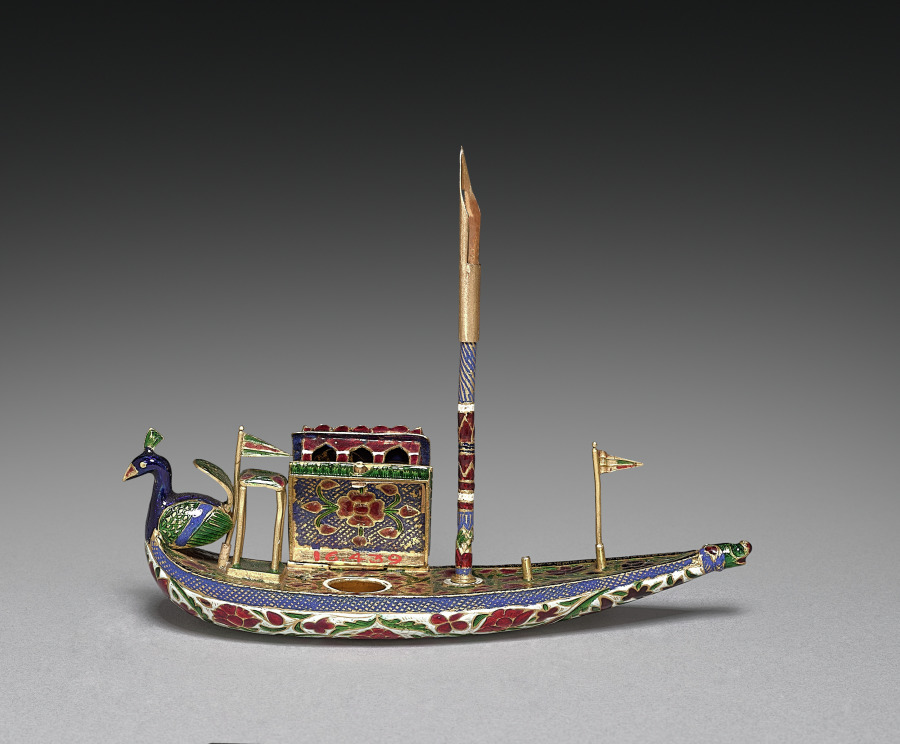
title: Inkstand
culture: Northwestern India, Rajasthan, Jaipur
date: 1800s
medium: Gold, silver, and enamel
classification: Jewelry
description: This enamel inkstand takes the fanciful form of a pleasure boat, linking the composing of poetry and the writing of calligraphy to the amusement of the senses. The luxurious materials and elegant form also indicate that scribal activities require a certain level of refinement. Cleverly, the enamelist placed a lotus design on the bottom of the vessel; as a flower that floats on water, the bloom represents both the water imaginatively splashing against the underside of the boat and the actual ink swishing inside the bilge. This inkstand was purchased by Cleveland Museum of Art founder Jeptha Homer Wade II (1857–1926) and his wife Ellen Garretson Wade (1857–1917) as they made a tour of India on their own pleasure boat, the Wadena.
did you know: The silver core of this inkwell has been covered in gold leaf.